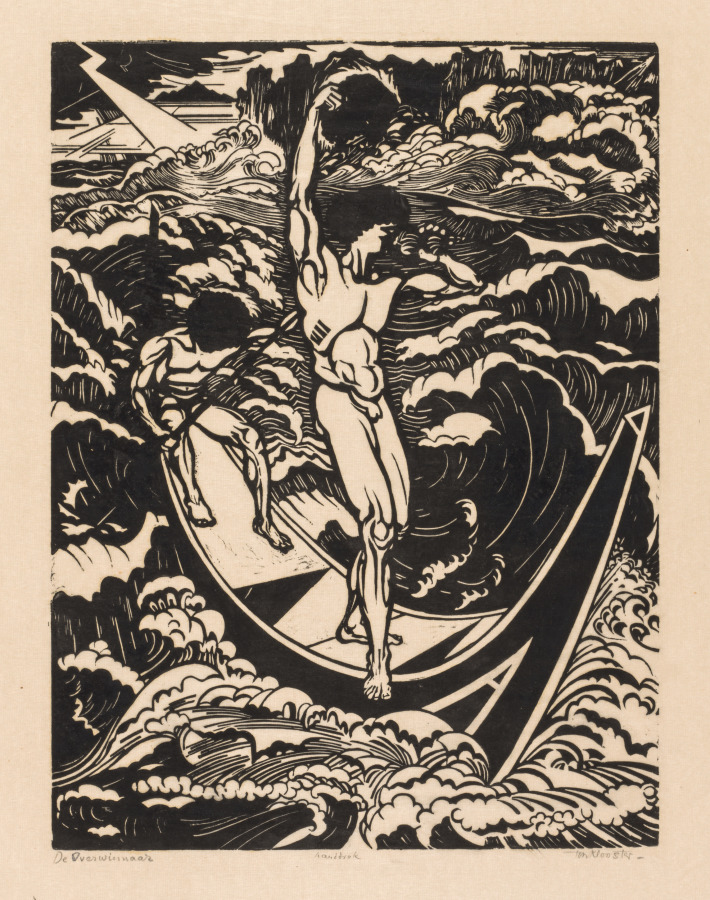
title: The Conqueror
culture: Netherlands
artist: J. F. E. Ten Klooster (Dutch, 1873–1940)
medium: woodcut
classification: Print